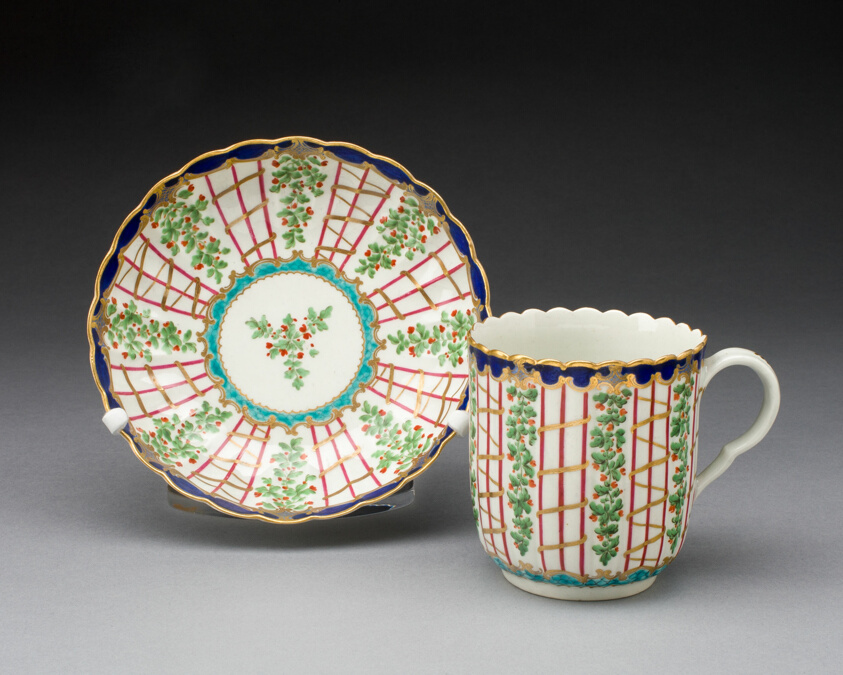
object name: Ceramics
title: Coffee Cup and Saucer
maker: Worcester Porcelain Factory (Warmstry House Period, 1751–1783); Worcester, England, founded 1751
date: 1775/80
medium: Soft-paste porcelain, polychrome enamels and gilding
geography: Worcester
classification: drinking vessel; teaware; porcelain; european decorative arts; ceramics